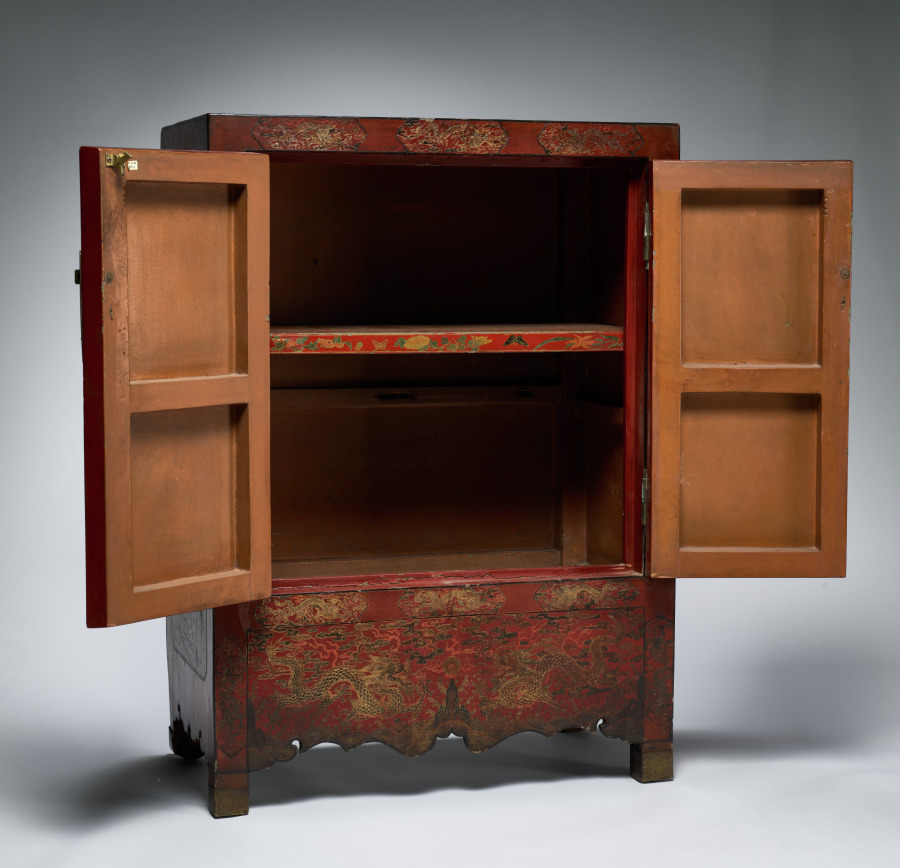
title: Double Cabinet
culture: China, Ming dynasty (1368-1644) - Qing dynasty (1644-1911)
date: 1600s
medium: red lacquer on wood with pigment and gilding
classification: Furniture and woodwork